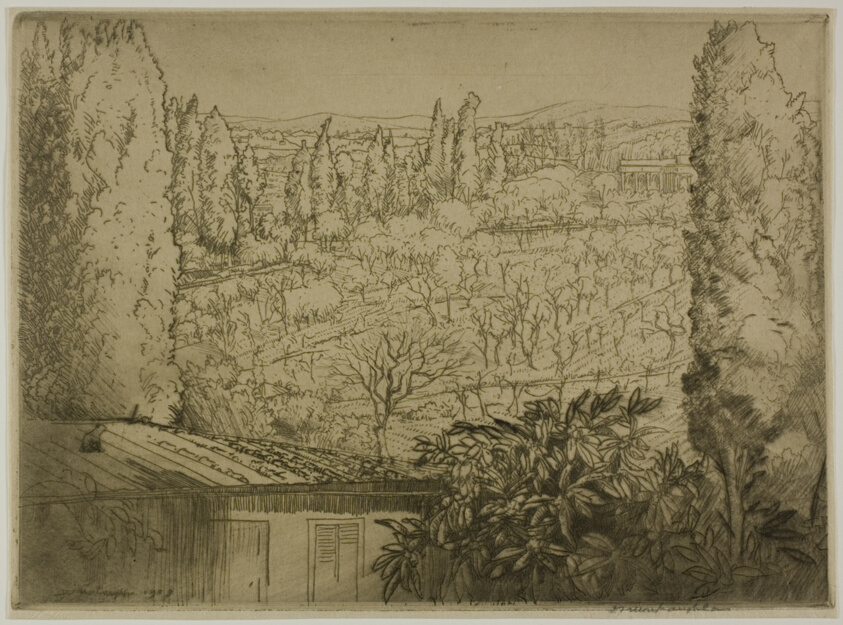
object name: Print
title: Tuscany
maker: Donald Shaw MacLaughlan (American, born Canada, 1876-1938)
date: 1909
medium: Etching in black on cream wove paper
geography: United States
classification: etching; print; prints and drawing